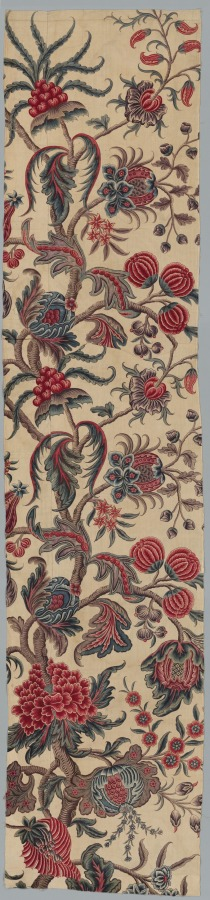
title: Strip of Woodblock Printed Linen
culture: France, late 18th century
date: c. 1785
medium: woodblock print on linen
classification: Textile